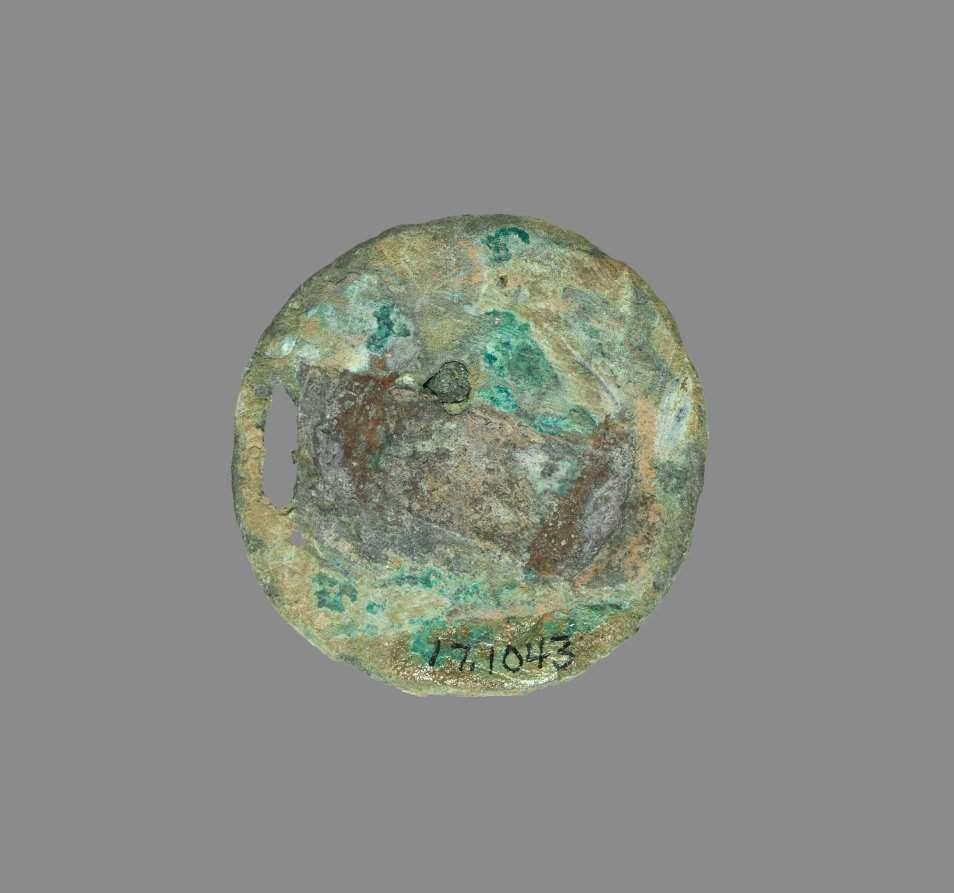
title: Seal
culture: Korea, Goryeo dynasty (918–1392)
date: 918–1392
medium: bronze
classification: Metalwork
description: A large quantity of bronze seals were excavated from tombs of the Goryeo dynasty. This bronze seal appears to have been used for stamping the sealed envelopes of letters. The lion-shaped ornament serves as the handle of the seal. While it is much corroded, the face and tail of the seated lion gazing upward are delicately expressed. Beneath the face of the lion is a hole through which a string can be threaded.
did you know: A large quantity of bronze seals excavated from tombs of the Goryeo dynasty is closely related to the development of metallurgy in 13th-century Korea that allowed the transition from wood type to movable metal type printing.